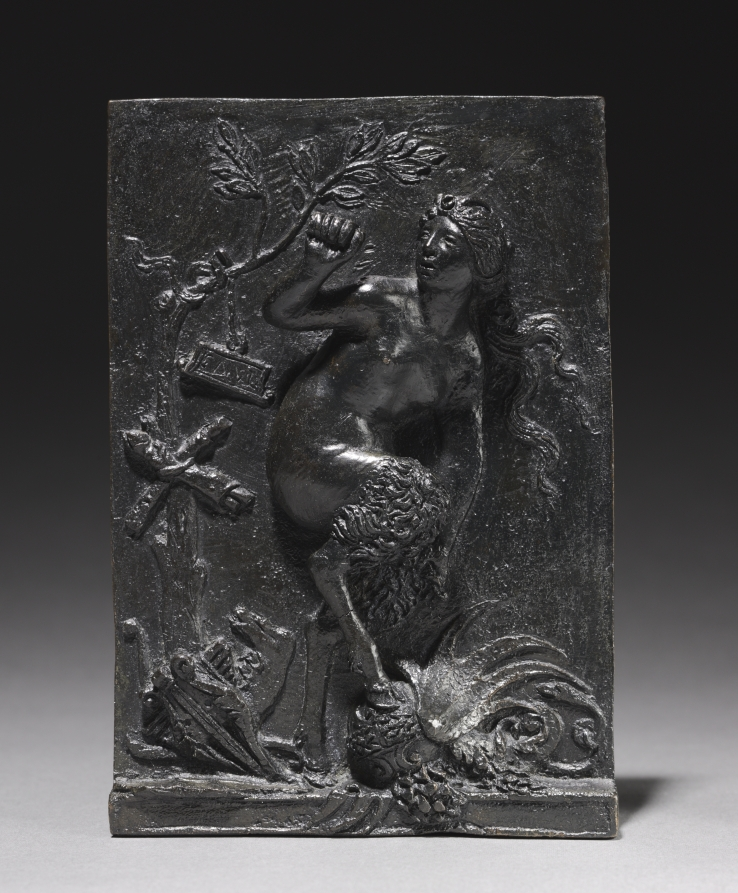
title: Satyress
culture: Italy, 16th century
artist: Giovanni Maria Mosca (Italian, 1495/99–1574)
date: c. 1525–1528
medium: bronze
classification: Sculpture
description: In antiquity, satyrs were lustful woodland deities who delighted in wine and revelry. Renaissance artists adopted them as symbols of vice and carnal love; the female satyr, or satyress, on this bronze plaquette, recently reattributed from Riccio to Mosca, was probably derived from a copper engraving of a Roman sarcophagus by Marcantonio Raimondi (c. 1470/82-1527/34). Both the sarcophagus and subsequent engraving depicted a bacchanalia, or scene of orgiastic carousal; the peculiar objects surrounding the satyress have been added by the artist, possibly in an effort to remove the figure from her lewd original composition and give a more refined meaning. The satyress rests her right hoof upon a plumed helmet. A coiled shape, possibly a snake, winds out of the helmet. To her left, a laurel tree stands with only half of its branches in bloom. Two severed animal legs are tied around its trunk and an illegible plaque hangs from one of its branches. A lyre, a pan pipe, an animal jawbone and a bow are gathered at the base of the tree. The highly allegorical nature of the work uses obscure symbols, rather than a distinct narrative, to convey meaning and could possibly be read as an allegory of physical pleasure overcoming virtue.